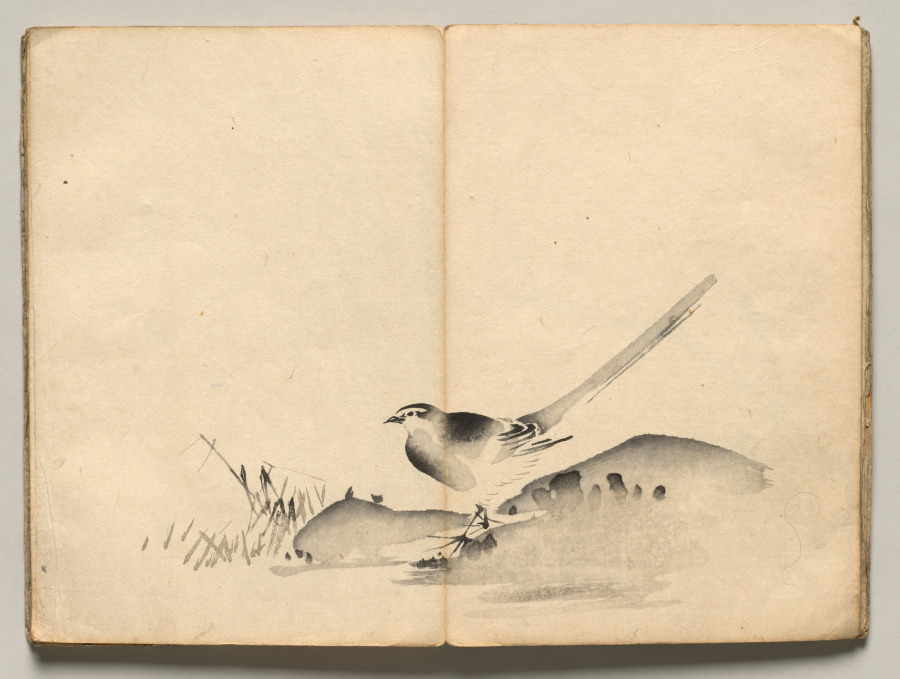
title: Azure-Winged Magpie from Ōkyo Picture Book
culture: Japan, Edo period (1615–1868)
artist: after Maruyama Ōkyo (Japanese, 1733–1795)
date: 1850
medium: accordion-style woodblock printed folding-book; ink and color on paper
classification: Bound Volume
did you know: This impression of a book of woodblock-printed designs is missing a spread that depicts a crane.